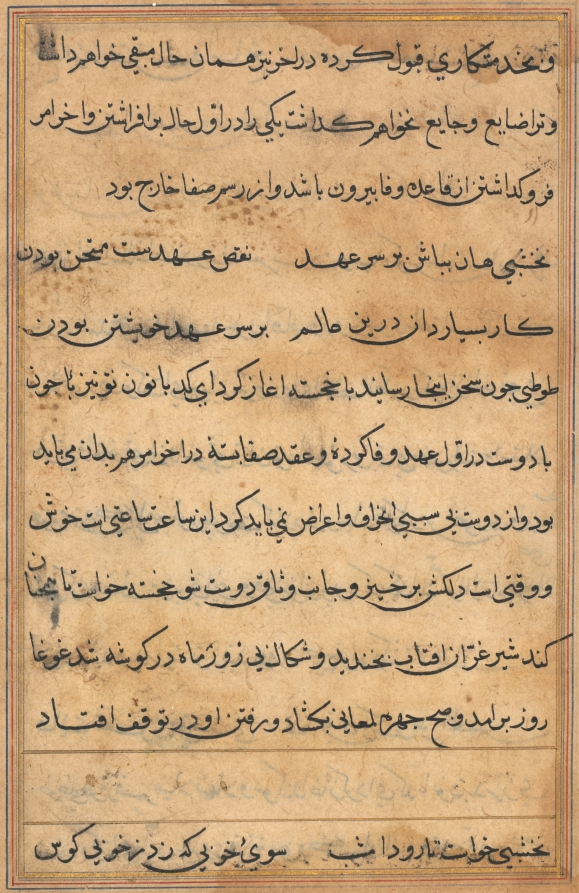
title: Page from Tales of a Parrot (Tuti-nama): text page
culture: Mughal India, court of Akbar (reigned 1556–1605)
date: c. 1560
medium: gum tempera, ink, and gold on paper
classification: Painting